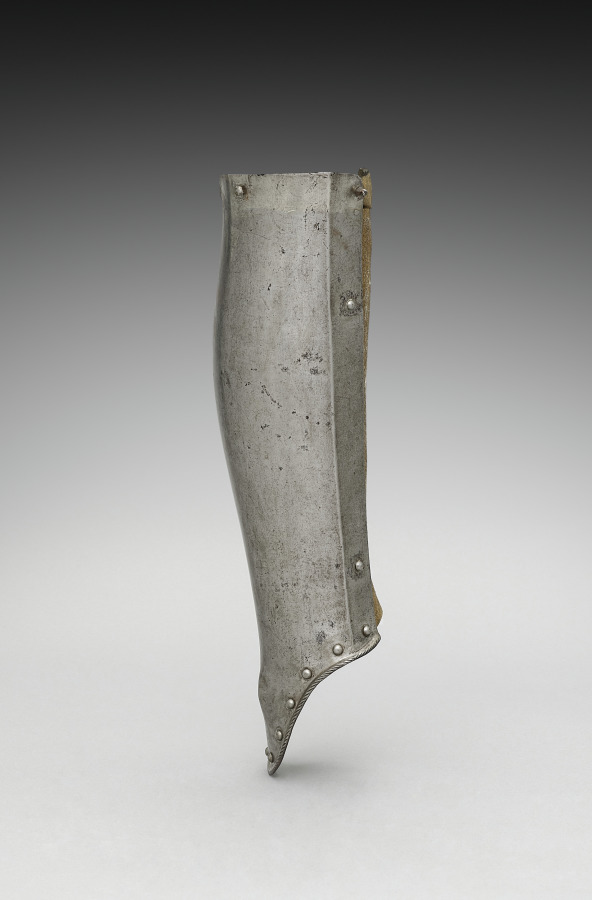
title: Right Greave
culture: Germany, 19th century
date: 1801–1900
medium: steel with black paint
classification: Arms and Armor